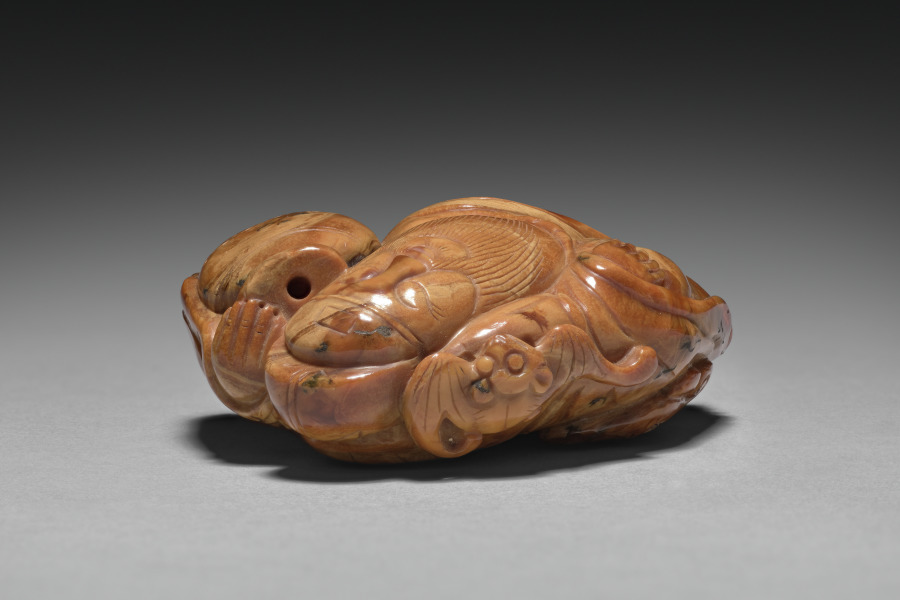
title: Li Taibo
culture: China, Qing dynasty (1644-1911)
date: 1700s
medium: amber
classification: Stone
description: This piece of ochre amber is carved in the round in the form of Li Bai 李白 (701–762), also known as Li Taibai or Li Taibo, 李太白. He was a poet in the golden age of Chinese poetry. Around a thousand poems are attributed to him. Li’s eyes are closed, an arm wrapped around his wine jar, in a drunken sleep. Perched on his shoulder is a bat, considered a lucky symbol as the Chinese word for bat, 蝠 fú, is pronounced the same as “good fortune” 福. Deer, like the one nestled behind Li, traditionally symbolize longevity and prosperity. These auspicious symbols create a bittersweet contrast with the legendary story that Li drowned while drunk when reaching to grasp the moon's reflection in the river.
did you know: Li Bai was one of the Eight Immortals of the Wine Cup, Tang dynasty scholars who enjoyed drinking alcohol.